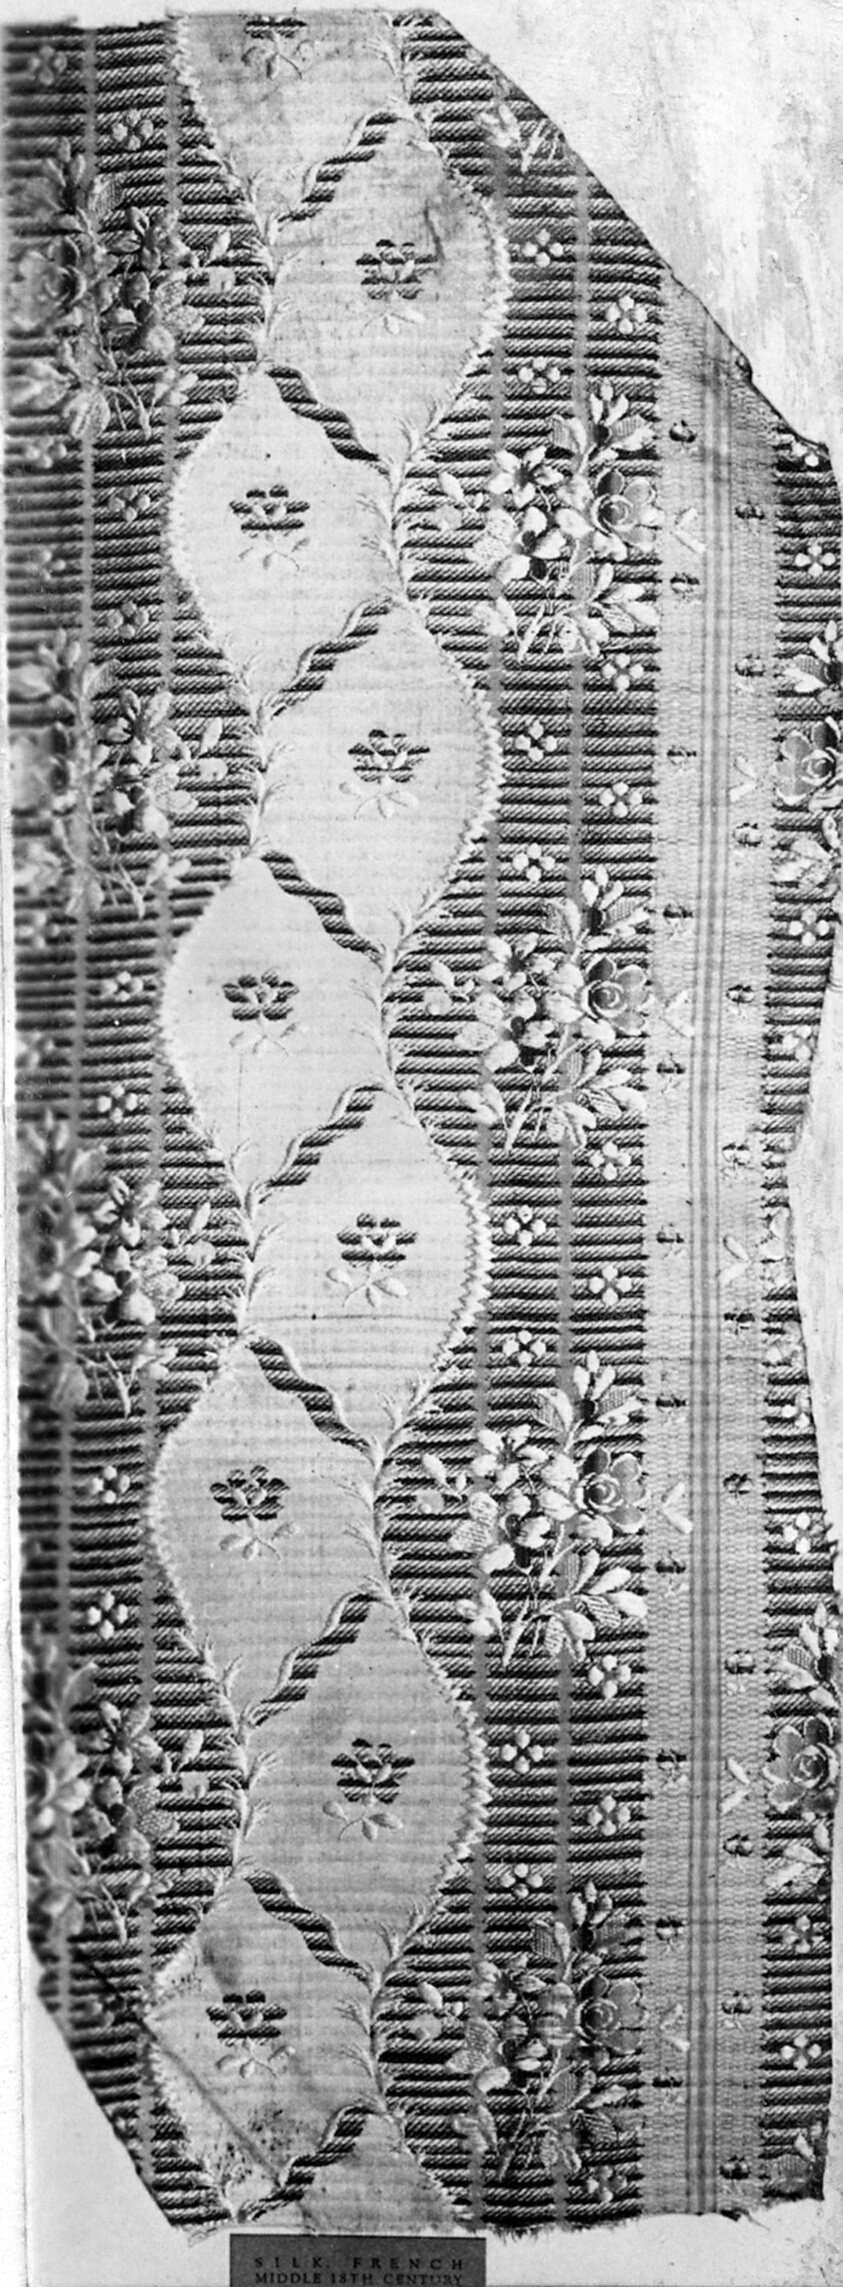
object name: Textile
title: Fragment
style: louis xvi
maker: France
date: Louis XVI period, 1774–1792, late 18th century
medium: Silk, plain compound satin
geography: France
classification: textile; weaving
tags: ribbon, flowers